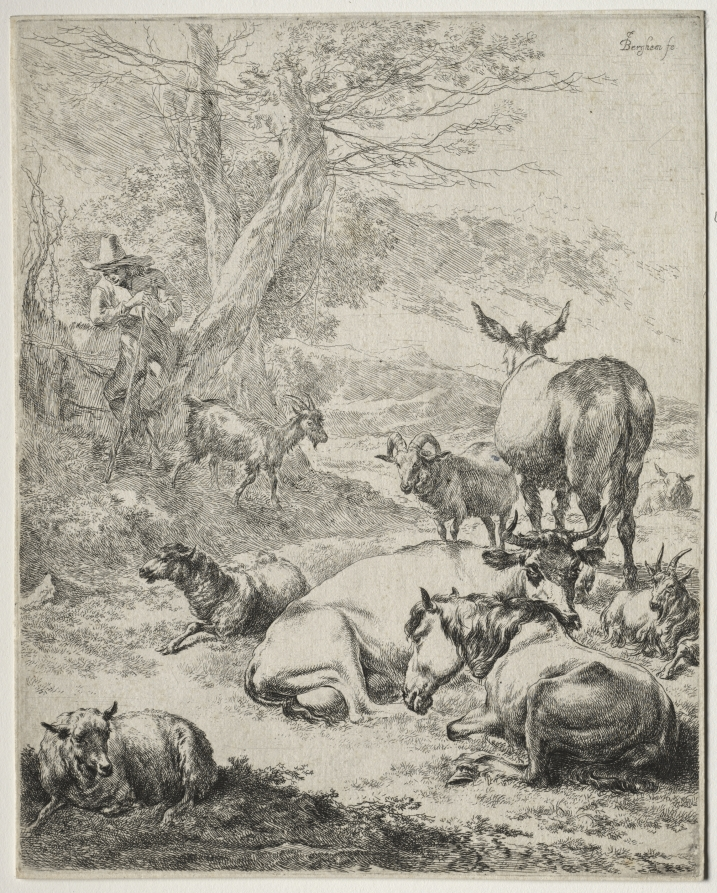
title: The Herd at Rest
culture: Netherlands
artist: Nicolaes Berchem (Dutch, 1620–1683)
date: c. 1652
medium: etching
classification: Print